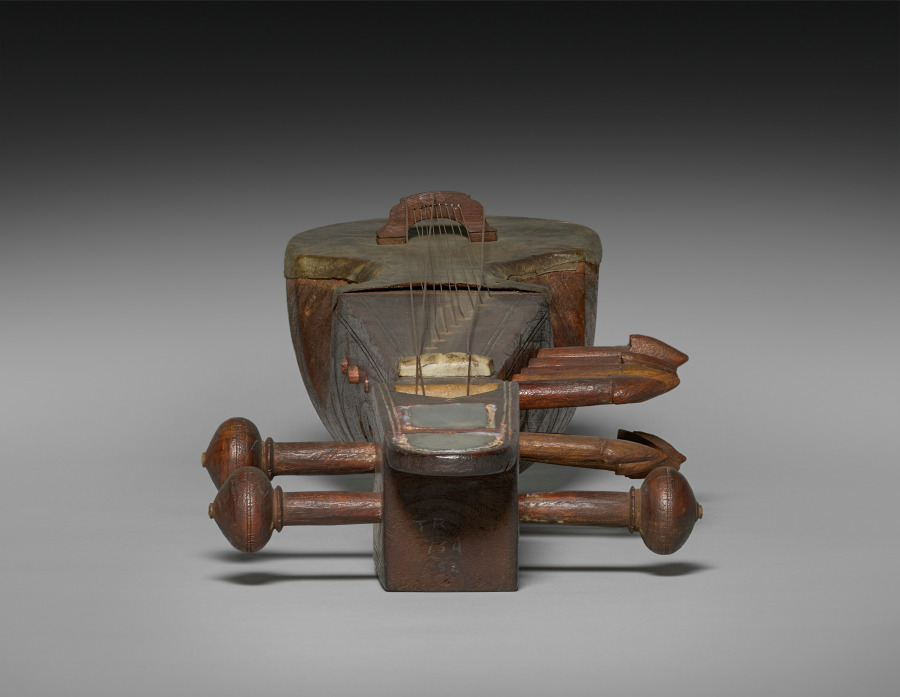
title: Sarangi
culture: India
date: 1800s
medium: Wood with traces of pigment, parchment, bone or ivory, mirrored glass, and copper strings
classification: Musical Instrument